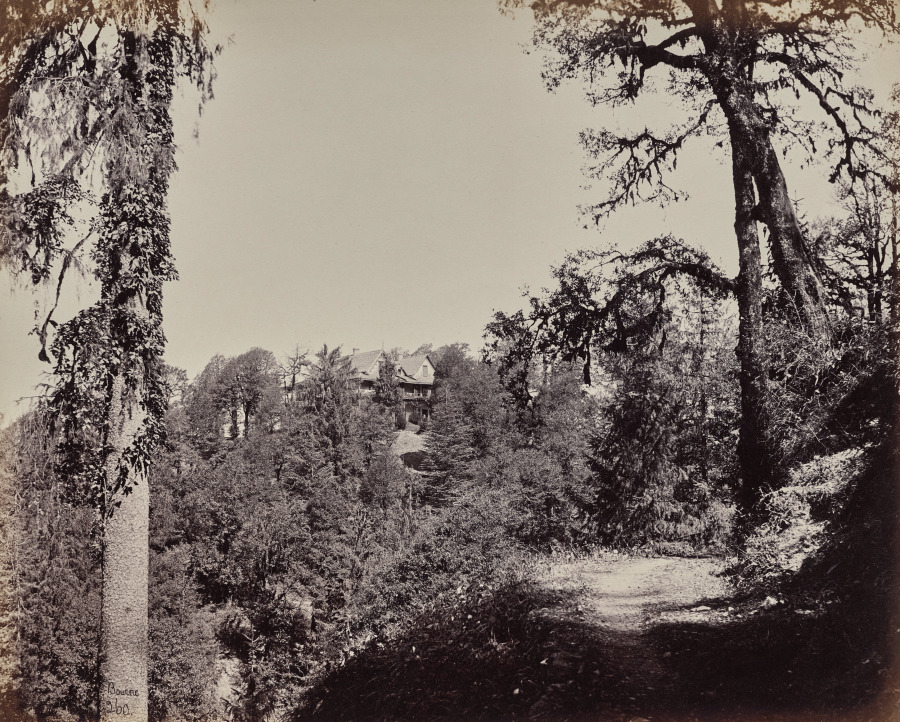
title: Shimla. Sir Hugh Rose's Bungalow at Mahasso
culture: England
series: Photographs of Northern India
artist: Samuel Bourne (British, 1834–1912)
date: 1863–70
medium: albumen print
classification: Photograph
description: The 50 images in this album, all taken in the 1860s, move from the hill towns of the Himalayas down to cities including Lahore (now in Pakistan), Delhi, Lucknow, Agra, Benares (now Varansi), and Calcutta (now Kolkata). Architectural studies of major monuments offer valuable historical records of what sites such as the Taj Mahal and the imperial mosque of the Mughal emperors in Delhi looked like before 20th-century restorations.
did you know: Samuel Bourne, the author of most the images in this album, was a banker in England before he moved to India to become a professional photographer.